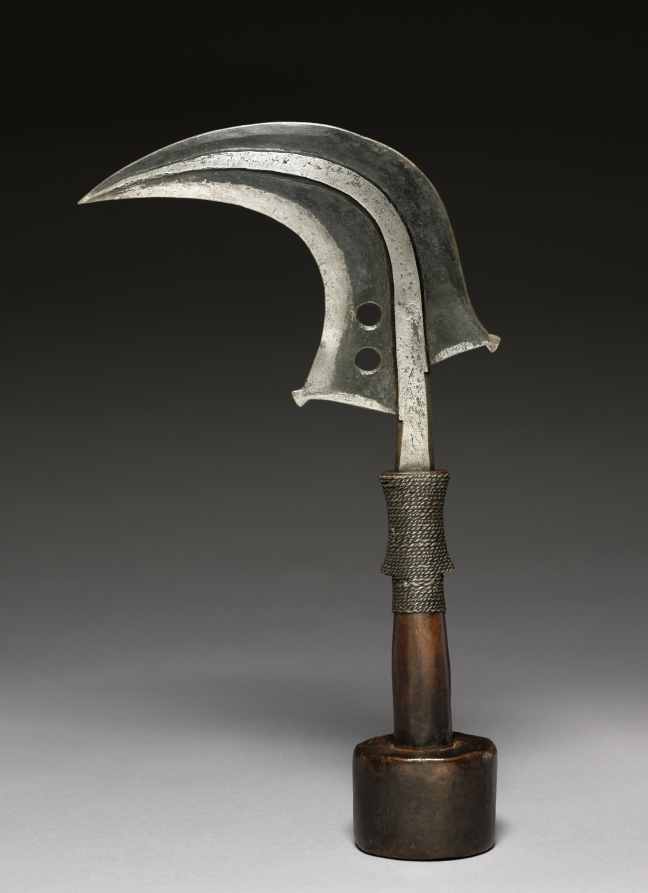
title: Throwing Knife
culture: Central Africa, Democratic Republic of the Congo, Oriental Province, Mangbetu, 19th century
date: 1800s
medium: Iron and wood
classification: Arms and Armor